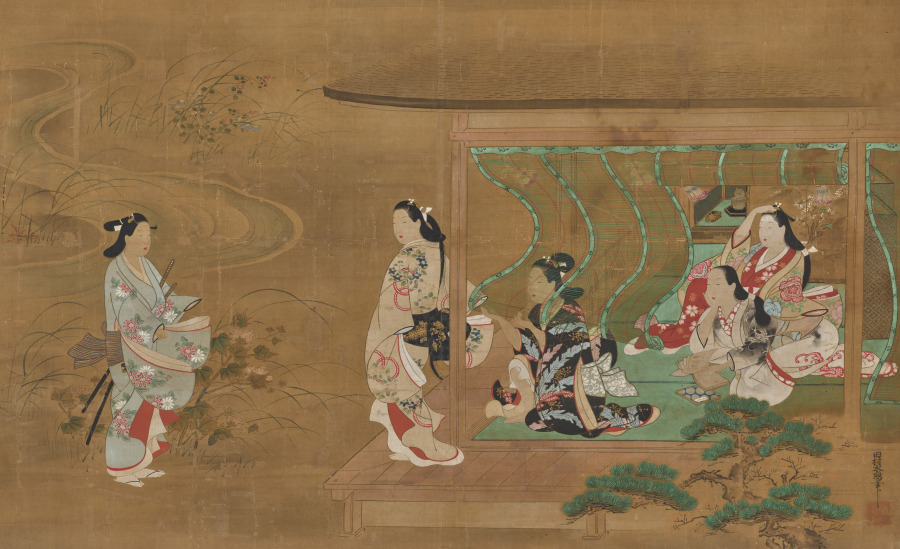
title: Beauty Receiving a Visitor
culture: Japan, Edo period (1615–1868)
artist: Tamura Suio (Japanese, active late 1600s–early 1700s)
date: late 1600s–early 1700s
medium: Hanging scroll; ink and color on silk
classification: Painting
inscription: artist's signature and seal, lower right corner.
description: Here, a person steps out to the engawa, a wood-floored corridor that runs along the outer edge of a house, to greet a visitor as the individual’s companions look on. A strong breeze blows the sleeves of their robes and the translucent blinds enclosing their sitting room. The group’s wealth and high status is signified by the two swords the visitor carries and everyone’s intricately patterned garments. A raised blind lets the viewer peek in to see a black lacquer box decorated with designs in gold powder and a ceramic incense burner on a hexagonal lacquer tray positioned carefully in the room’s display alcove, or toko.